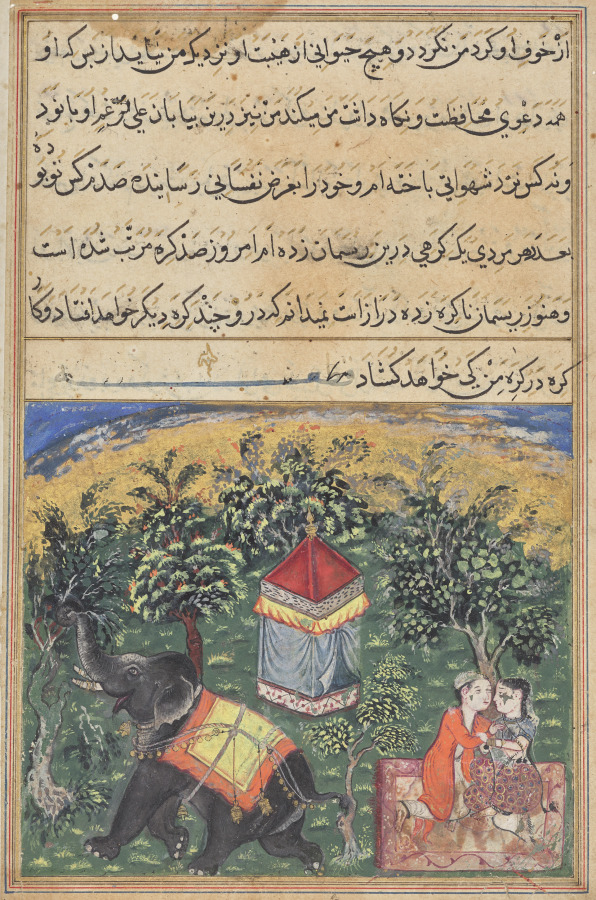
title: Page from Tales of a Parrot (Tuti-nama): text page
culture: Mughal India, court of Akbar (reigned 1556–1605)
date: c. 1560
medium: gum tempera, ink, and gold on paper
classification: Painting